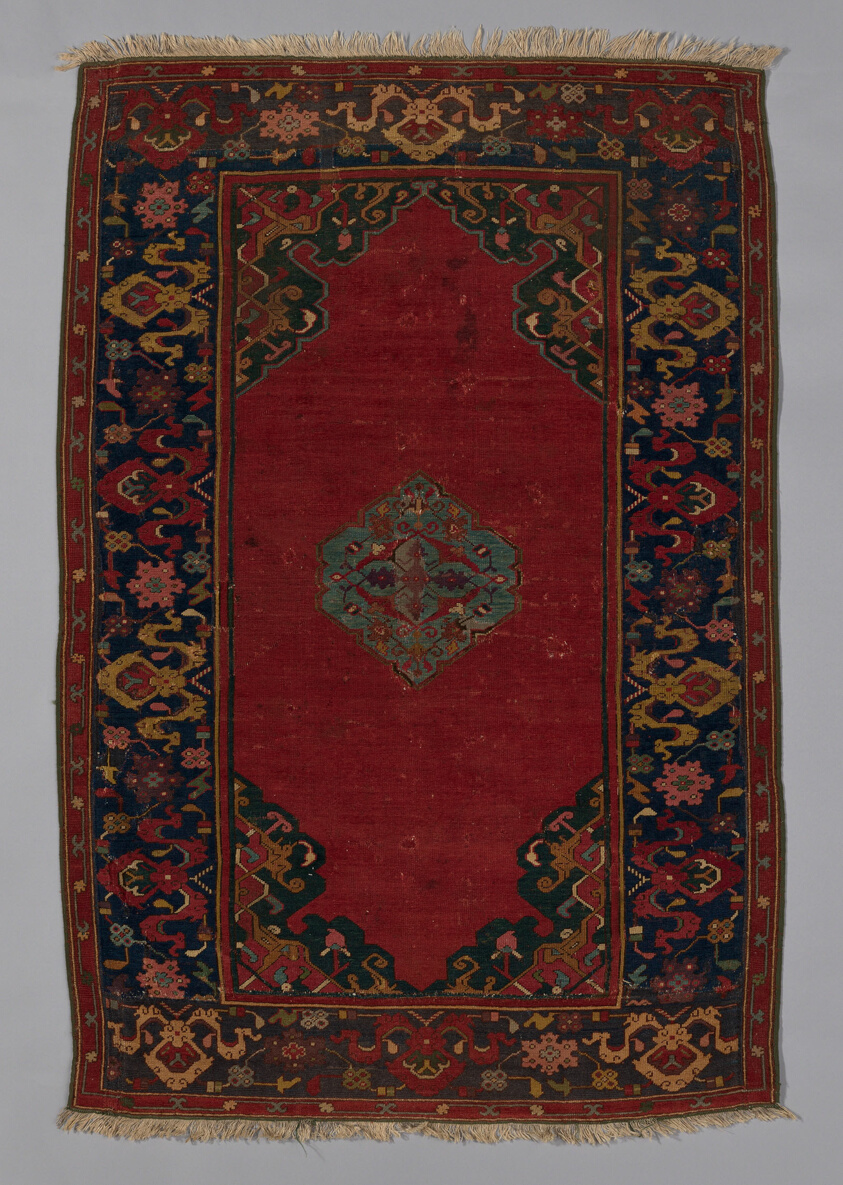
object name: Textile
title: Carpet (Ushak double-ended prayer rug)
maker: Probably Romania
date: 17th century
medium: Wool, plain weave with supplementary wrapping wefts forming cut pile through a technique known as "Ghiordes (Turkish) knots"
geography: Romania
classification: weaving - carpet; textile